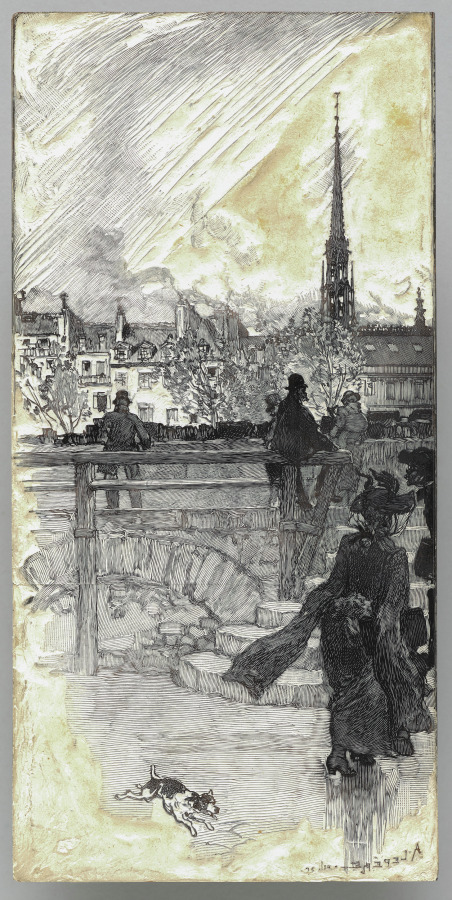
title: Quai des Grands Augustins, Paris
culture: France, 19th-20th century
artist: Auguste Louis Lepère (French, 1849–1918)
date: 1886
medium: woodblock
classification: Woodblock